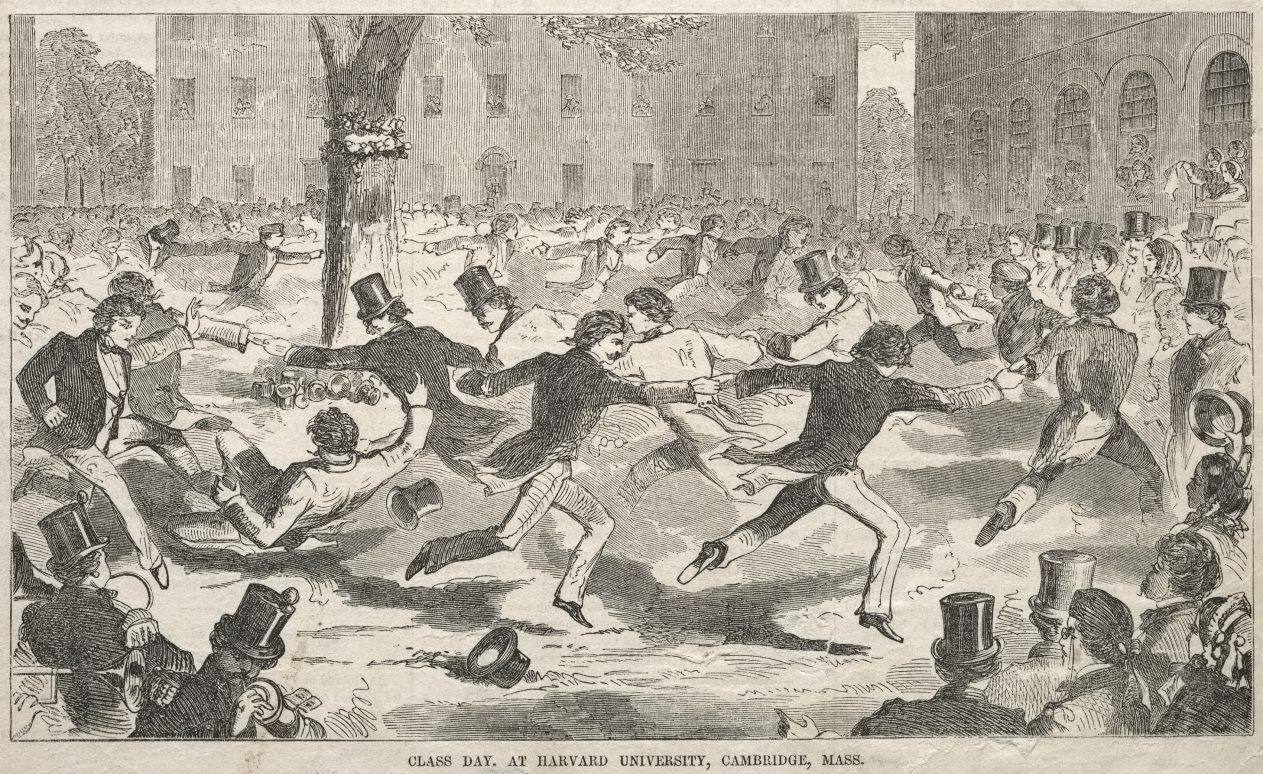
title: Class Day, at Harvard University, Cambridge, Massachusetts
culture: America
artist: Winslow Homer (American, 1836–1910)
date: 1858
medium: wood engraving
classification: Print